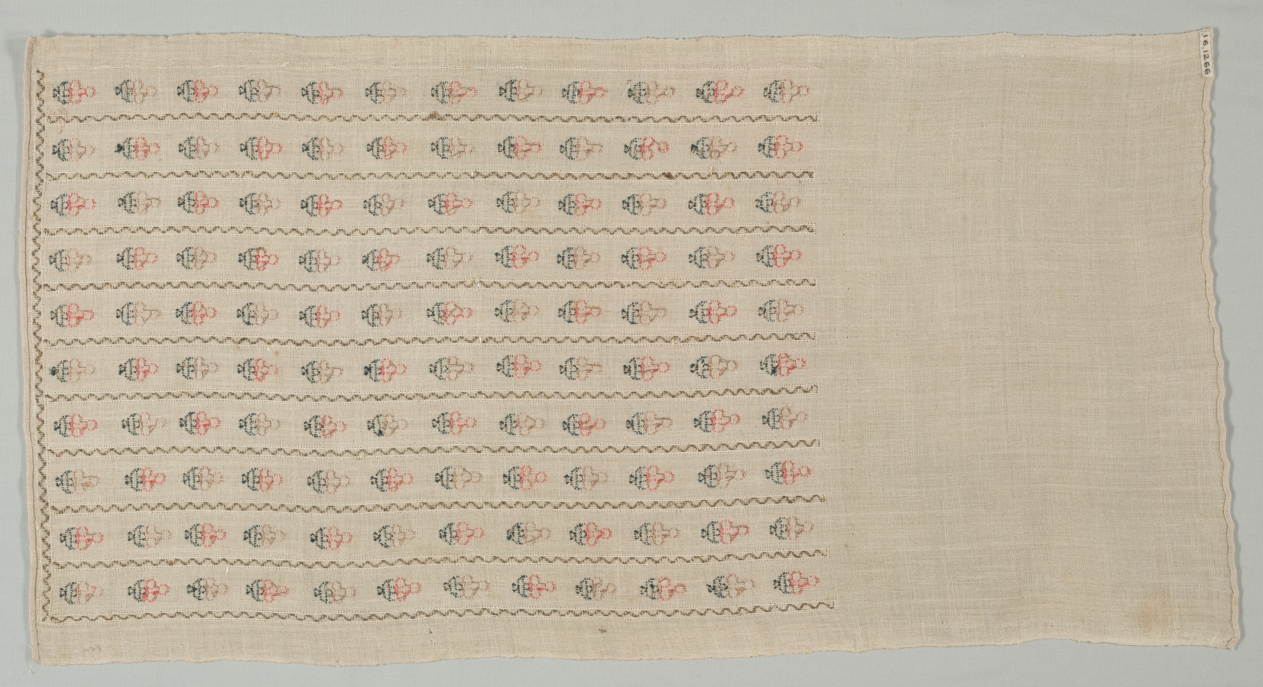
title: Embroidered Towel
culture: Turkey, 19th century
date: 19th century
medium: embroidery; silk and gold filé on linen tabby ground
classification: Embroidery